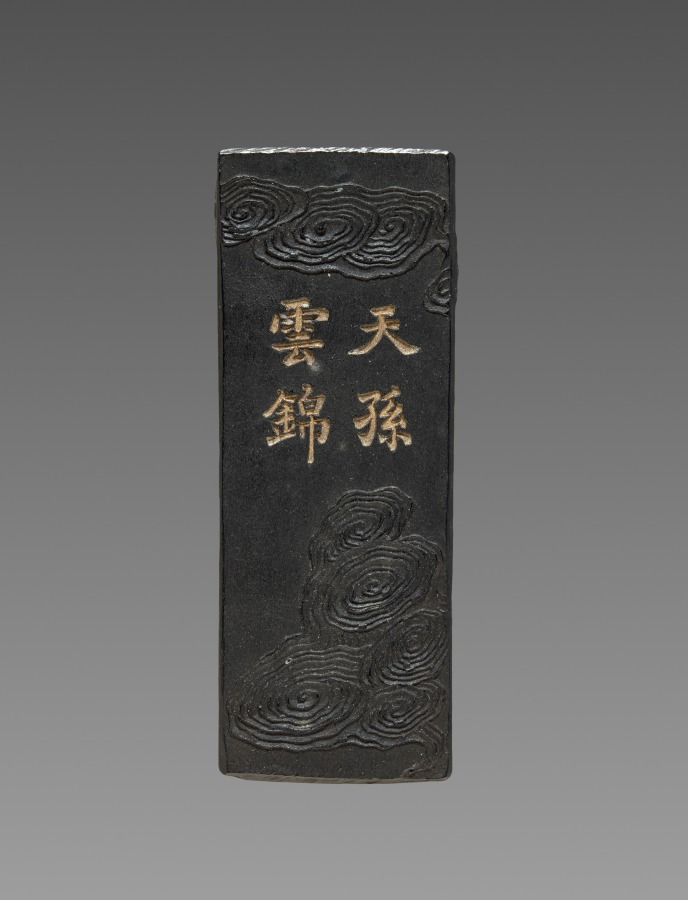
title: Ink Cake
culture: China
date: 1800s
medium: ink cake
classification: Miscellaneous